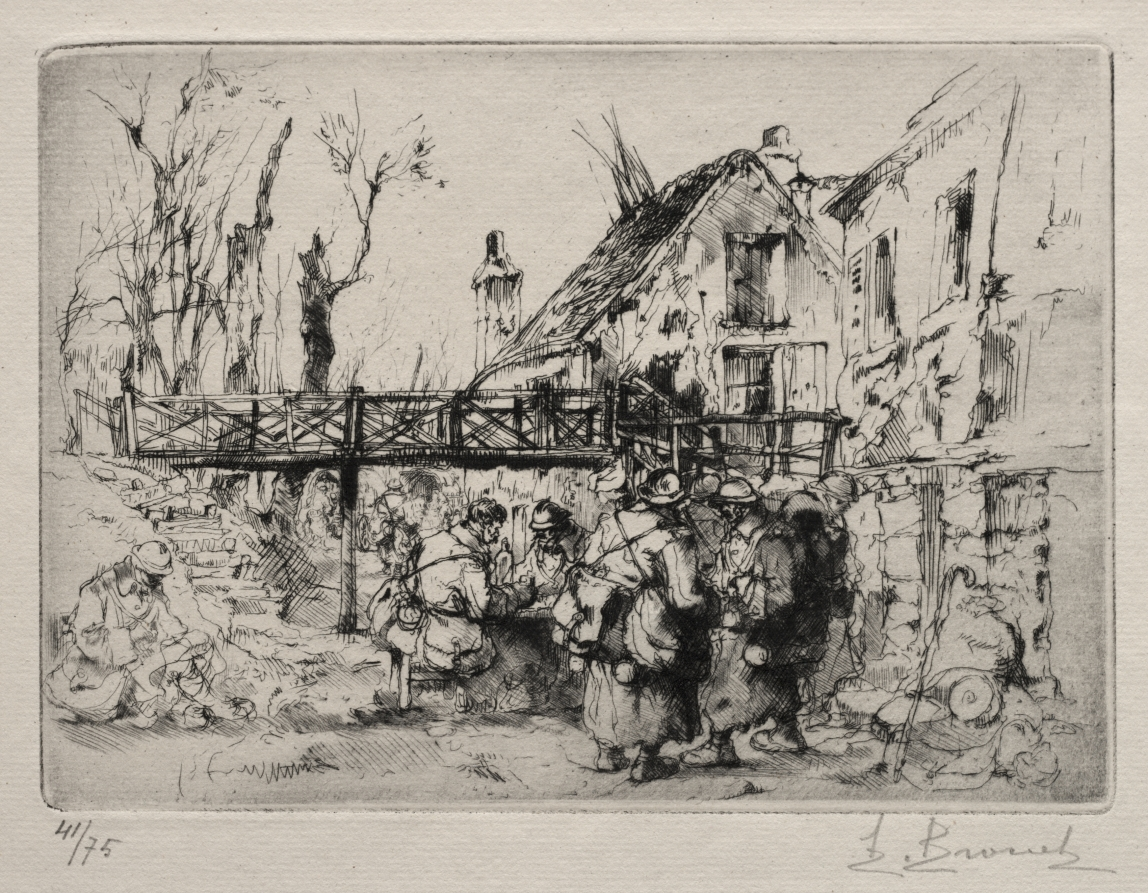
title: The Halt at the Village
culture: France, 20th century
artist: Auguste Brouet (French, 1872–1941)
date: before 1925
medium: etching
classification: Print